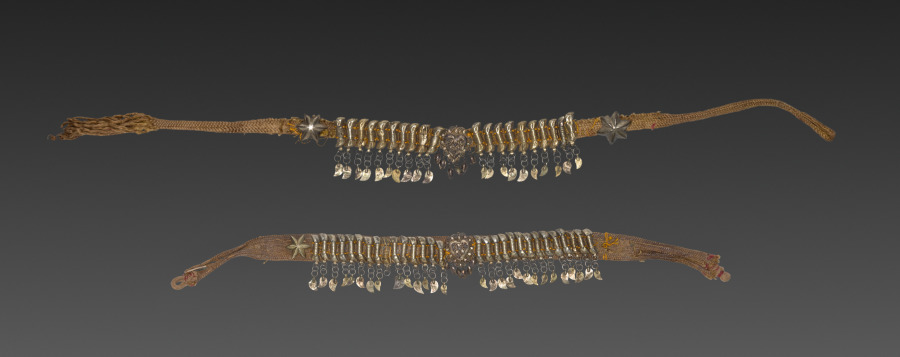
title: Armlets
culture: Silesia, 19th century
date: 1800s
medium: silver gilt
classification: Jewelry